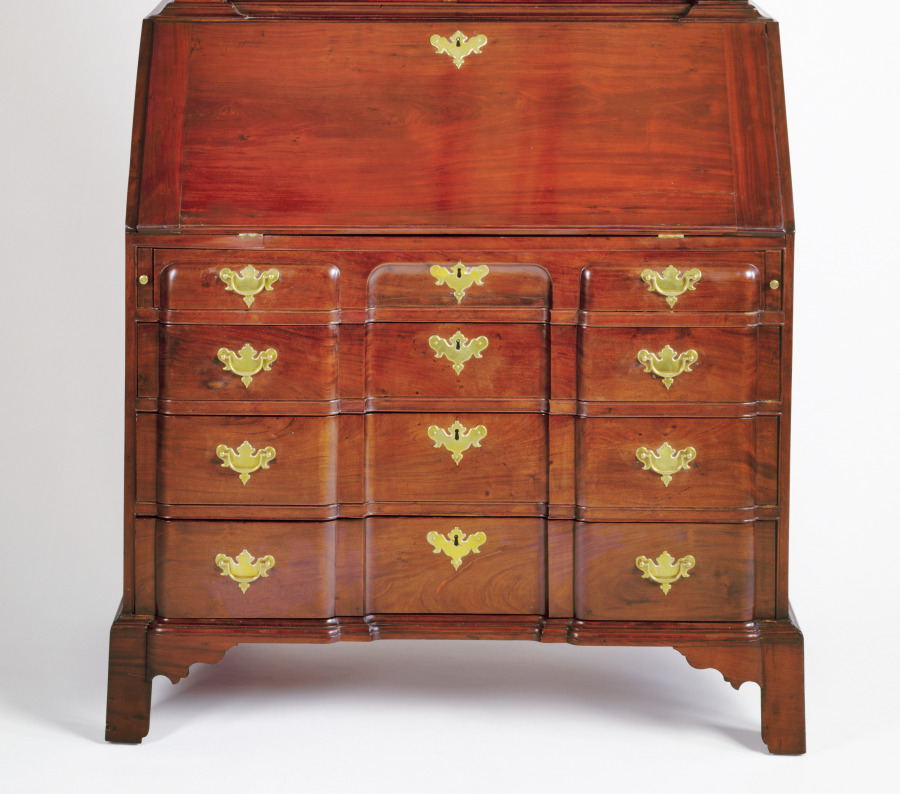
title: Desk Section of a Desk and Bookcase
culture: America, Massachusetts, Boston or vicinity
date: c. 1780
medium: mahogany and pine, brass hardware, gilding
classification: Furniture and woodwork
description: During the 1700s, a desk and bookcase, sometimes called a bureau in early inventories, was among the largest and most expensive pieces of furniture in a household. Their owners were chiefly businessmen and community leaders, and because of their function as repositories for personal letters and documents, they were usually placed downstairs in a back parlor or hall. A desk and bookcase consisted of two parts: usually a slant-top desk below and a cabinet above that sat within moldings applied to the desktop to hold it in place. The form often included elements derived from contemporary architecture. Like much New England furniture of the later 1700s, the lower section of this example is block-fronted, in which the profile recedes in the center and protrudes at either side. Though some European precedents can be found for block fronting, this type of cabinetry was clearly more popular in America than anywhere else.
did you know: This desk is the lower section of a desk and bookcase. A desk and bookcase in the 1700s, often equipped with several locks and keys as in this example, served as a self-contained office for the gentleman of the household.